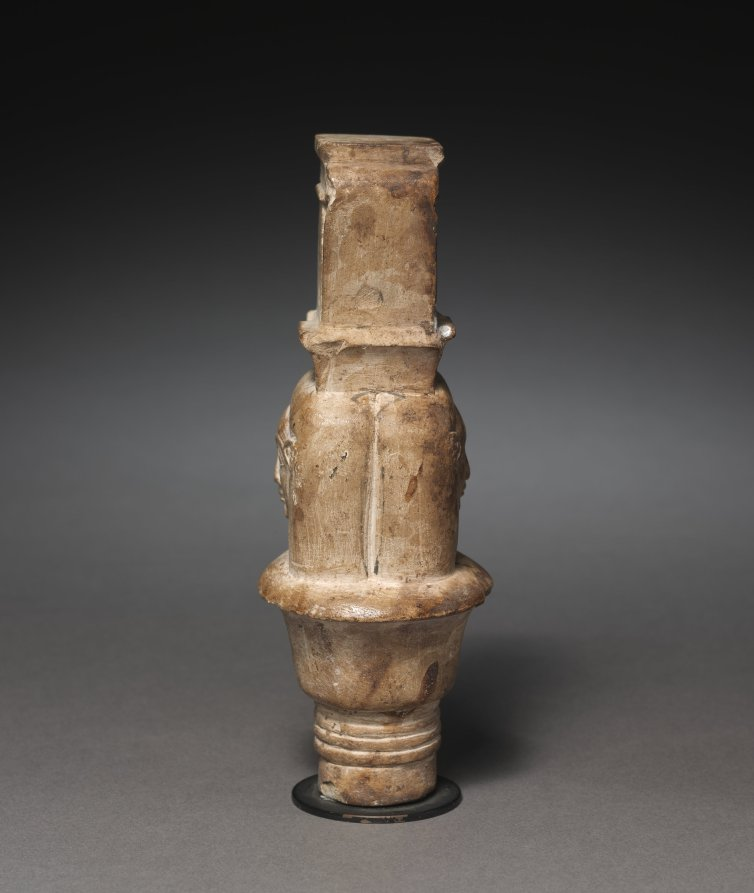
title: Votive Hathor Column Capital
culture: Egypt, Late period (715–332 BCE), Dynasty 30–Greco-Roman period (332 BCE–395 CE), Ptolemaic dynasty (305–30 BCE)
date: 380–30 BCE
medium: limestone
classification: Sculpture